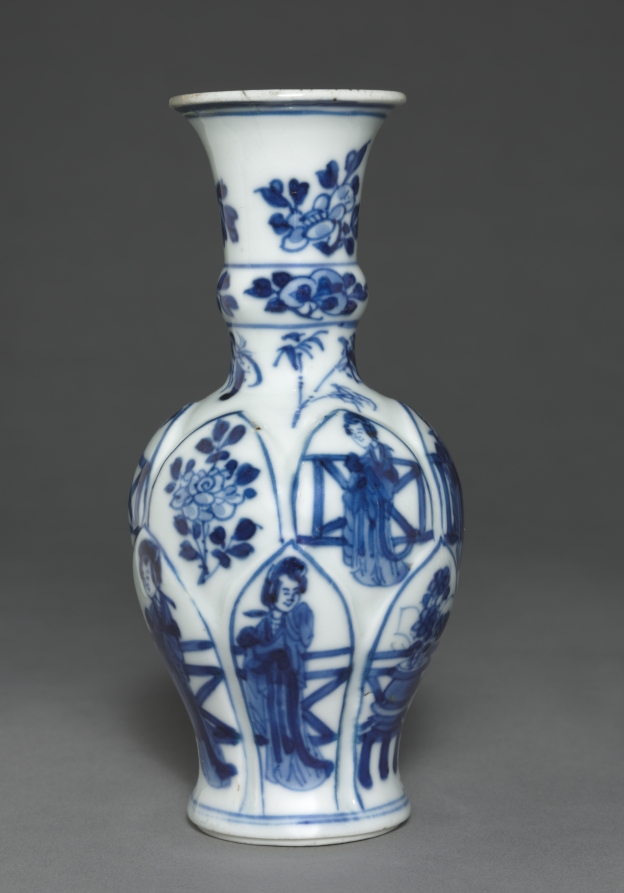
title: Vase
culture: China, Qing dynasty (1644-1911), Daoguang reign (1821-1850) - Xianfeng reign (1851-1861)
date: 19th Century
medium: porcelain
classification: Ceramic